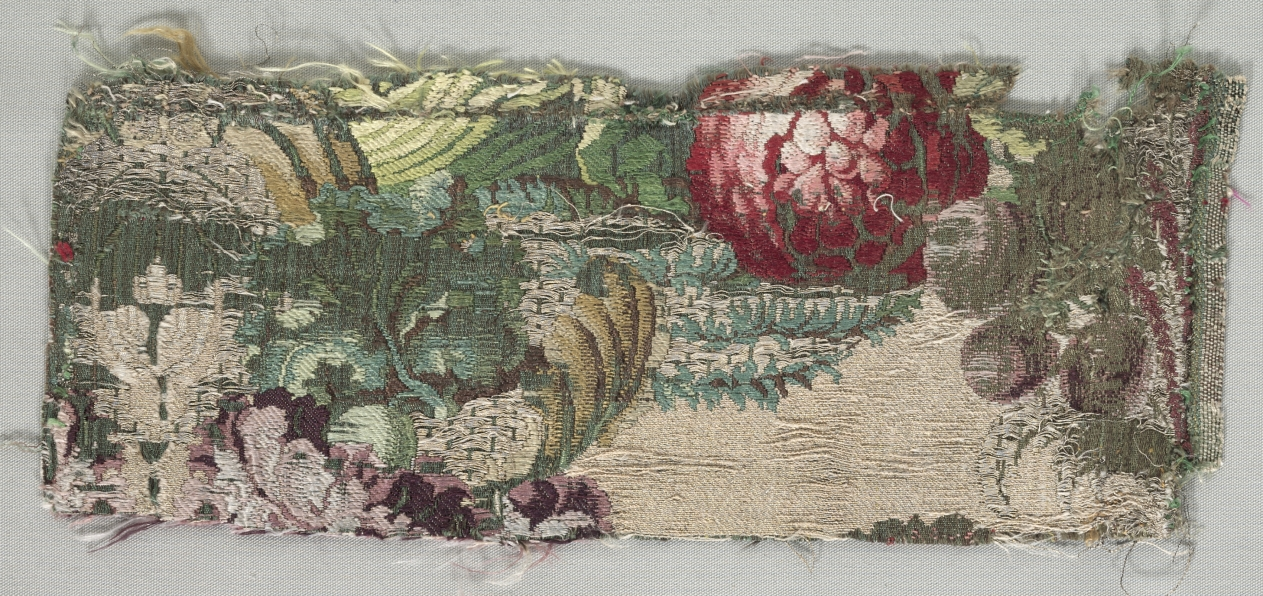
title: Length of Textile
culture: Italy, 18th century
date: 1700s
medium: brocade; silk and metal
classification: Textile